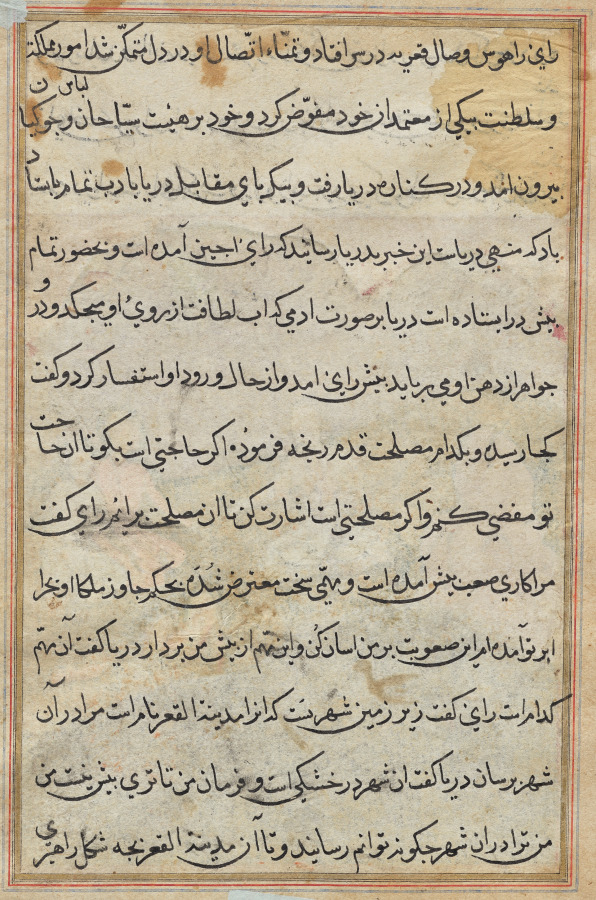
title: Page from Tales of a Parrot (Tuti-nama): text page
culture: Mughal India, court of Akbar (reigned 1556–1605)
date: c. 1560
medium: gum tempera, ink, and gold on paper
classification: Painting